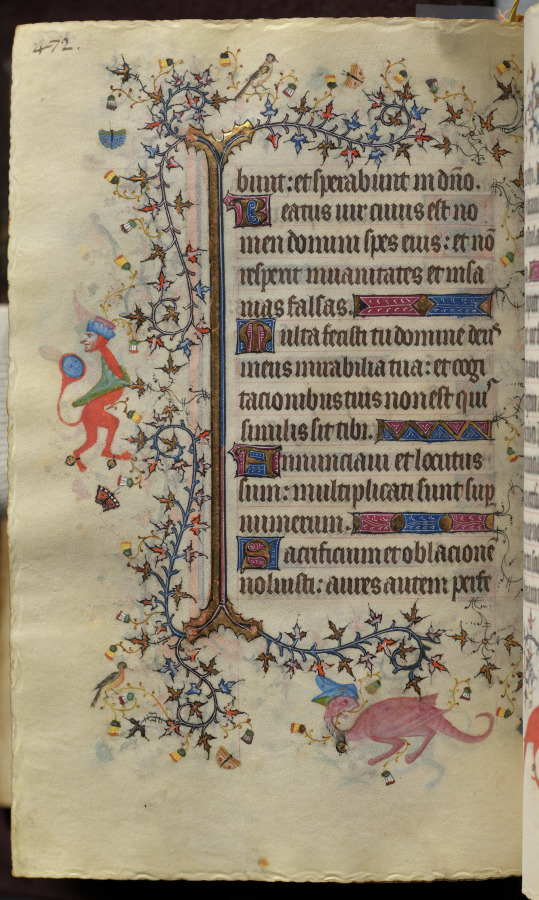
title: Hours of Charles the Noble, King of Navarre (1361-1425): fol. 230v, Text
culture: France, Paris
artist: Master of the Brussels Initials and Associates (French)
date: c. 1405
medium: ink, tempera, and gold on vellum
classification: Bound Volume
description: This precious volume was obviously highly prized by its owner, the French-born King of Navarre, who had his coat of arms painted on no less than twenty folios. Rather than directly commissioning this manuscript from a specific workshop, it seems that Charles the Noble acquired his book of hours -- perhaps ready-made for the luxury market -- while on a trip to Paris in 1404-05. A collaborative effort, six painting styles are evidenced within the pages of this codex, those of two Italians, two Frenchmen, and two Netherlanders. The painter who was responsible for the planning and decoration of the book, and who produced seventeen of the large miniatures, was a Bolognese artist known as the Master of the Brussels Initials. His principal assistant, responsible for most of the borders, was a Florentine who signed his name "Zecho" da Firenze on folio 208 verso.